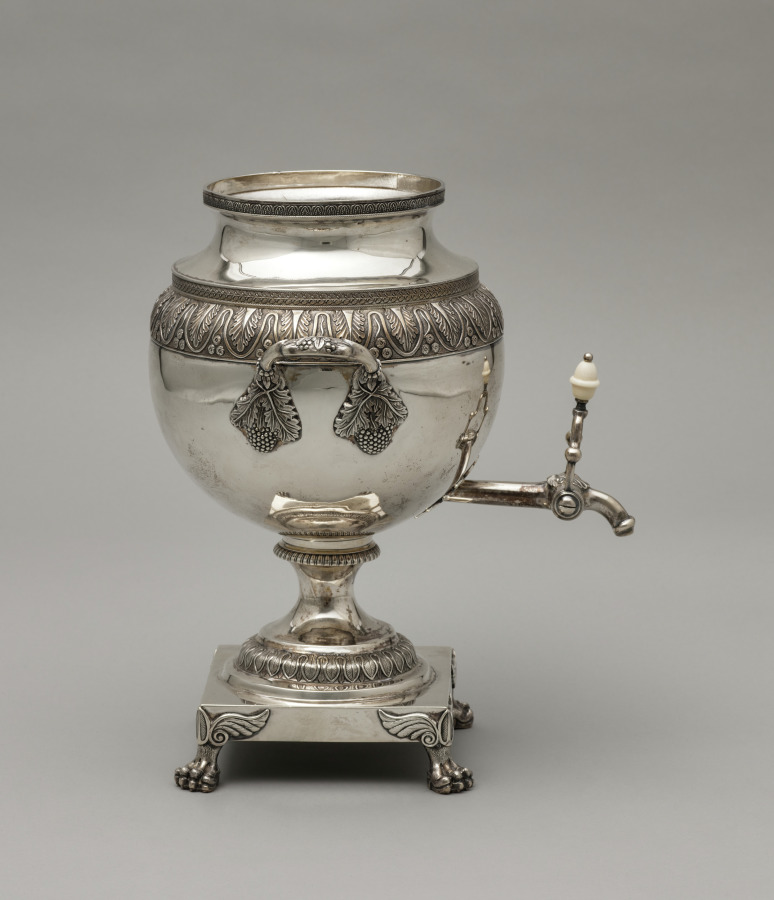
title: Tea Urn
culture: America, Pennsylvania, Philadelphia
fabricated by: Harvey Lewis (American, 1835)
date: 1811–25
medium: silver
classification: Silver